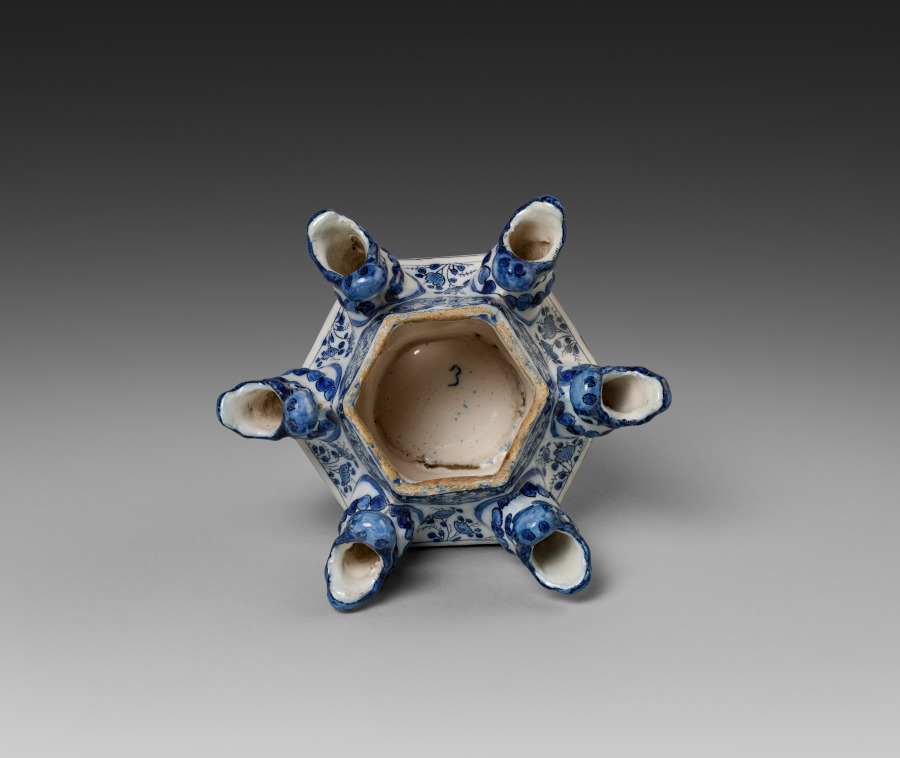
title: Fifth Tier for a Flower Pyramid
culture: Netherlands, Holland, Delft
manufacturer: Adrianus Kocx (Dutch, active 1686–1701)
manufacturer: De Grieksche A (The Greek A) Factory (Netherlands, 1658–1811)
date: c. 1690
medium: Tin-glazed earthenware, painted in blue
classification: Ceramic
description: Allegorical figures representing Faith, Hope, and Love decorate the base of this pyramid, on which rest six tiers with spouts where flowers can be placed. Flower pyramids are among the most complex and luxurious types of ceramics produced in Delft in the late 1600s. This example was made in the Greek A Factory, owned by Adrianus Kocx. During his tenure, the factory became the most prestigious of Delft potteries and received commissions from Queen Mary II, who ruled over England, Scotland, and Ireland together with her husband, William III. She contributed to the international spread of the fashion for Delft ceramics.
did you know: The iconic blue-and-white ceramics from Delft originated as an attempt to copy Chinese porcelain.